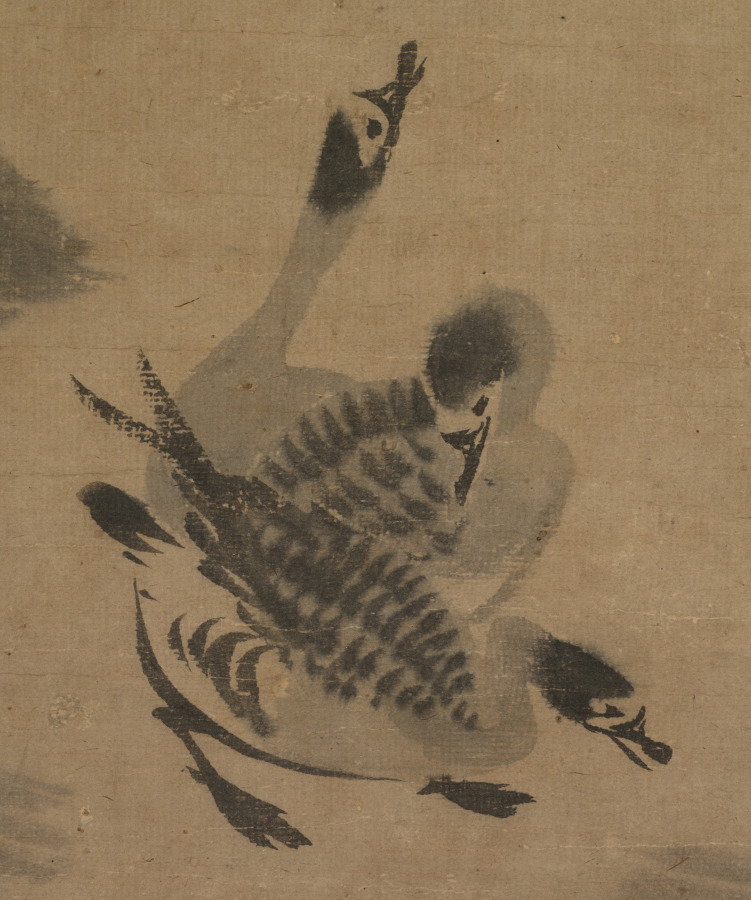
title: Reeds and Geese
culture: Japan, Kamakura period (1185–1333)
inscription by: Yishan Yining [Issan Ichinei] (Chinese, 1247–1317)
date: 1314–17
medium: hanging scroll; ink on paper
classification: Painting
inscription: signed: Issan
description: Reeds and geese has been a common pairing in Chinese literary and visual culture for many centuries. This painting presents the contribution of a Japanese amateur painter, almost certainly a Zen Buddhist monk, to Japan’s fledgling efforts to add the theme to its own cultural vocabulary in the early 1300s. As was customary at the time in Japan, the painter did not sign or seal his work; the inscription, a poem added to the painting by the eminent émigré monk Yishan Yining, along with his signature and seal, was of far greater cultural value. Today, the modestly sized painting has tremendous significance as one of the earliest surviving examples of Japanese ink paintings with reeds and geese.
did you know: Tokyo National Museum owns a copy of this painting made by Kano Gyokusen (1796–1864) when he was 14 years old.